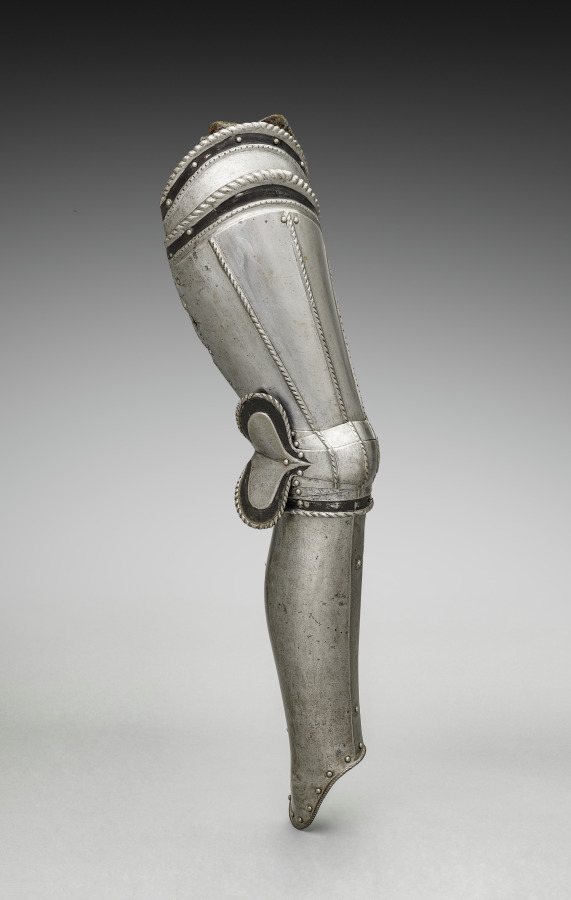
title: Right Leg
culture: Germany, 19th century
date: 1801–1900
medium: steel with black paint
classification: Arms and Armor